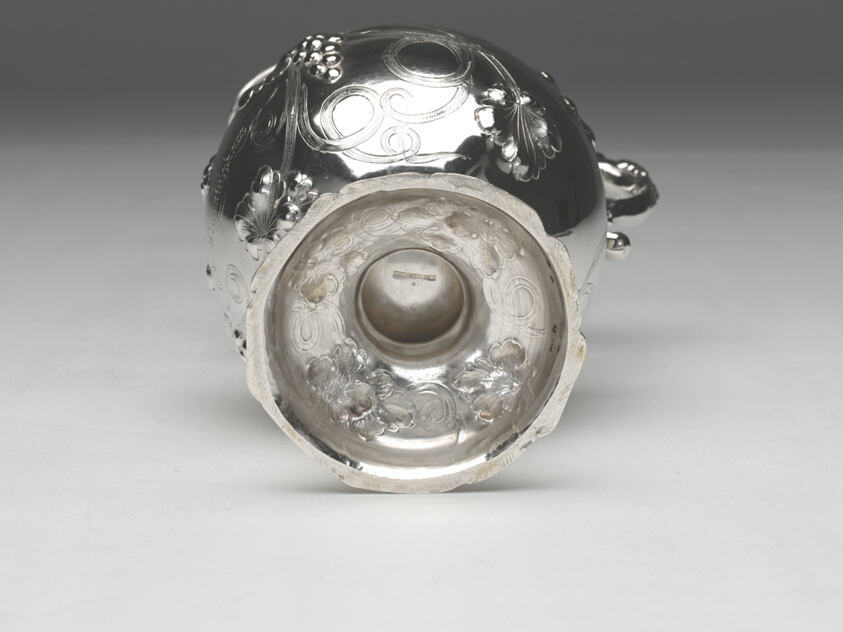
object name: Metalwork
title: Tea and Coffee Service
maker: Francis W. Cooper; American, active 1840–1851; New York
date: 1840–51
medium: Silver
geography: New York City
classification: tea service; silver; american decorative arts; american arts; decorative arts